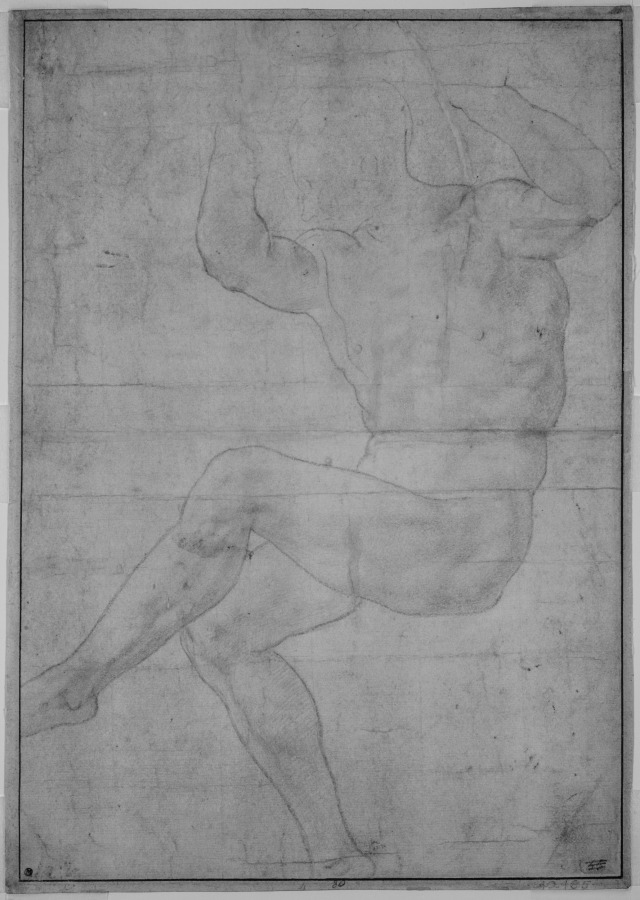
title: Study for the Nude Youth over the Prophet Daniel (recto)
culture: Italy, 16th century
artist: Michelangelo Buonarroti (Italian, 1475–1564)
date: 1510–1511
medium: red chalk over black chalk or charcoal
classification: Drawing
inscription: lower right, in brown ink: 55 [crossed out]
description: Universally considered one of the greatest artists of the Italian Renaissance, Michelangelo devoted four years to painting the vast ceiling fresco in the Sistine Chapel. This preparatory study portrays one of the 20 athletic male nudes, known as ignudi, who serve as supporting figures at each corner of the Old Testament scenes painted down the center of the ceiling. Michelangelo worked out the positioning of the ignudi in red chalk drawings before beginning to paint each section of wet plaster. The energy and monumentality of the figure in red chalk, whose body extends beyond the sheet, suggests the heroic athleticism of Michelangelo’s sculpture.